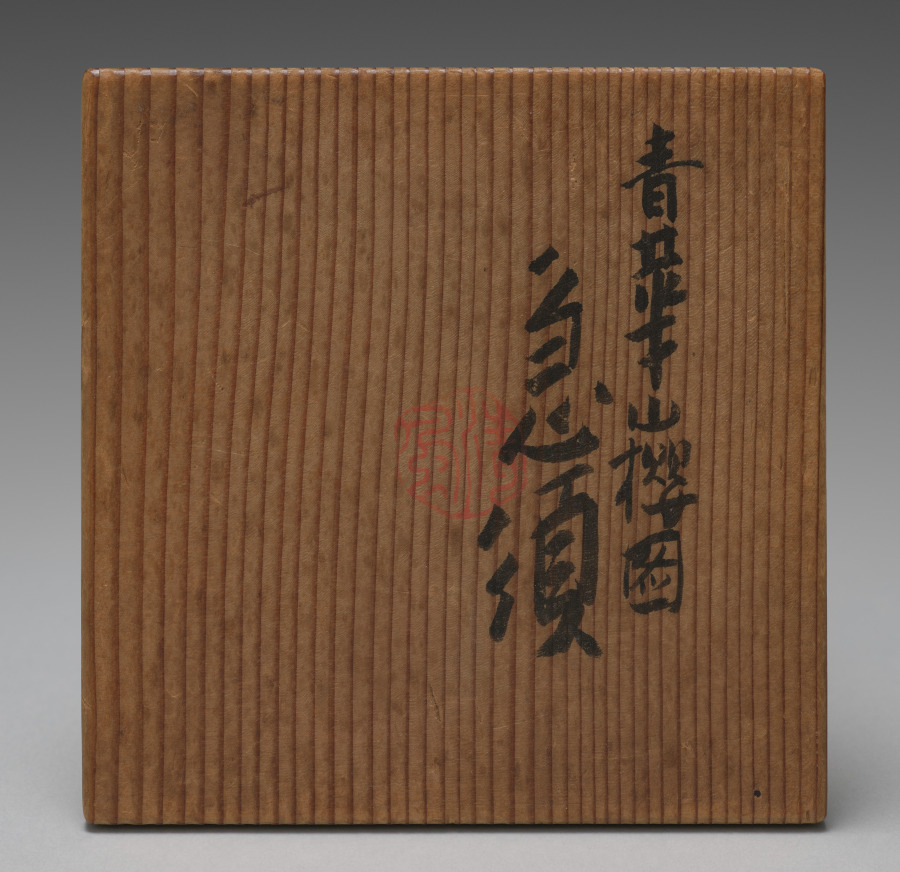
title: Teapot with Cherry Blossoms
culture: Japan, Taishō period (1912–26) or Shōwa period (1926–89)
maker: Seifū Yohei IV (Japanese, 1872–1951)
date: 1914–46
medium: Porcelain with underglaze blue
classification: Ceramic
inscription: 清風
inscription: 清風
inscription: 清風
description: This teapot with mountain cherry blossom motifs has its design in underglaze cobalt blue. It runs over both the pear-shaped body and the recessed lid, with its pointed, jewel-shaped handle. There is a faint bluish-green tint to the glaze. The mark impressed into the base of this work appears to be one used by Yohei III. However, the box inscription is brushed in a hand matching that of Yohei IV, and while the seal on the lid is one often used by Yohei III, that next to the signature on the back of the lid is one generally used by Yohei IV. The signature, too, resembles others belonging to Yohei IV. As the design, technique, and object named on the box accurately describe the contents, it seems unlikely, but not impossible, that it is mismatched. There are many cases in which Yohei III works are contained in boxes with inscriptions, seals, and a signature by Yohei IV. However, in such examples, Yohei IV clearly identifies himself as authenticating the work of his father and often includes his father’s Imperial Household Artist seal. This may be an example of a transitional piece in which Yohei IV has used his father’s mark on the base of his own work.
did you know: Cherry blossoms mark the arrival of spring, and their short-lived beauty is deeply anticipated and appreciated.